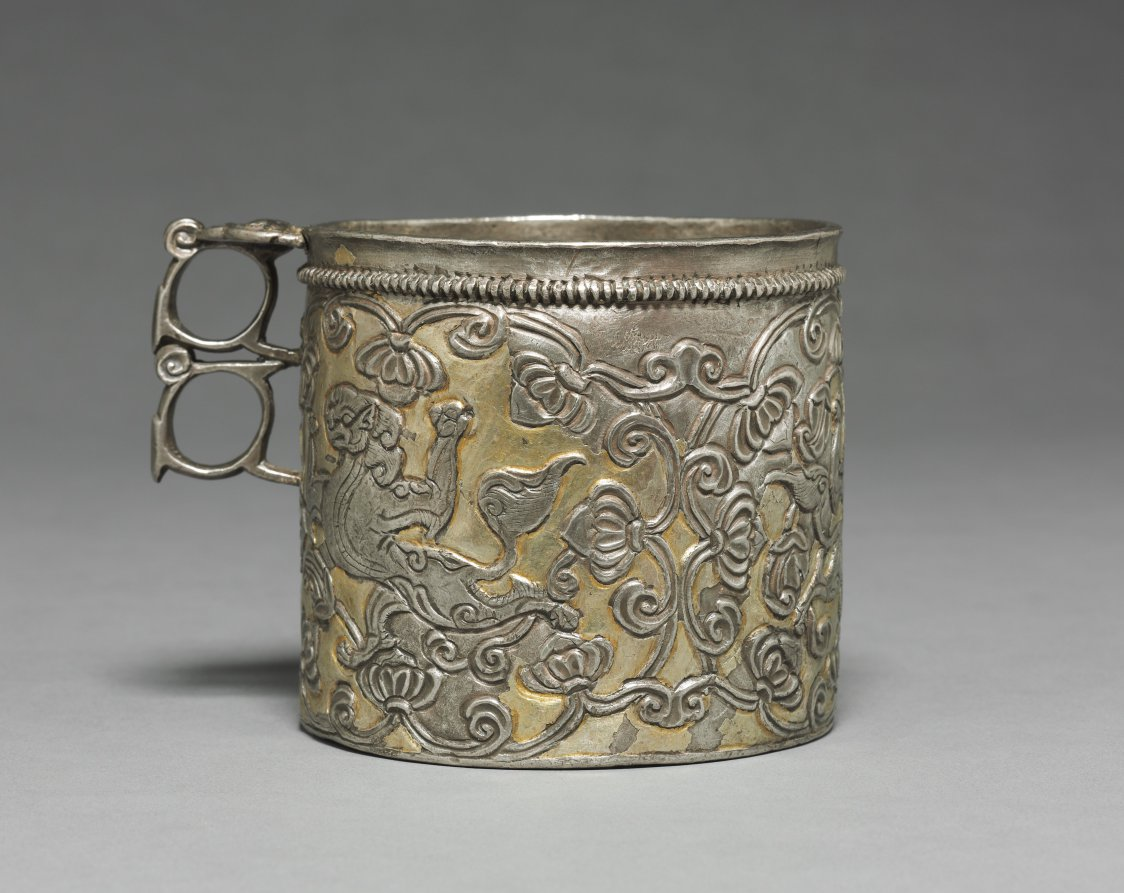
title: Beaker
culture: Central Asia (Sogdiana) or Tibet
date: c. late 600s–early 700s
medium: silver with gilding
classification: Silver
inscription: Inscribed on bottom of the cup: "Phan shing gong skyes gui sug byad (or byang)"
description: The circular shapes of the cup’s handle feature a flat edge on which the user rested their thumb for better grip, a design characteristic of silver objects made during the 700s by Sogdian artists, who traveled from Central Asia along international trade routes. An ownership inscription in Tibetan script on the underside of the cup identifies the vessel as a personal possession. The circles and lines carved below this inscription are likely measurements recording the weight of the silver used for the cup.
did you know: This cup depicts two lions and a lionlike animal with horns!